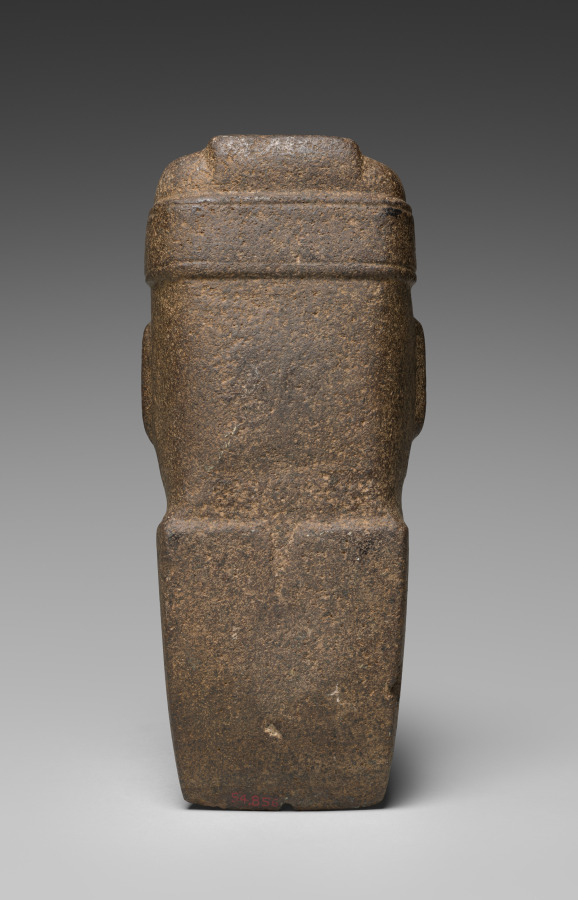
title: Celt with Deity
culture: Mesoamerica, Mexico, Olmec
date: 1000–300 BCE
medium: stone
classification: Sculpture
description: This ceremonial object has the head of a deity and a body shaped like an axe blade (celt) used to clear land for agriculture. The flared mouth, toothless gums, and fangs are typical of Olmec supernatural beings. The meaning of the body's "four-dots-and-a-bar" motif is unclear, but it sometimes appears in depictions of plants. The deity, then, seems to be associated with fertility.